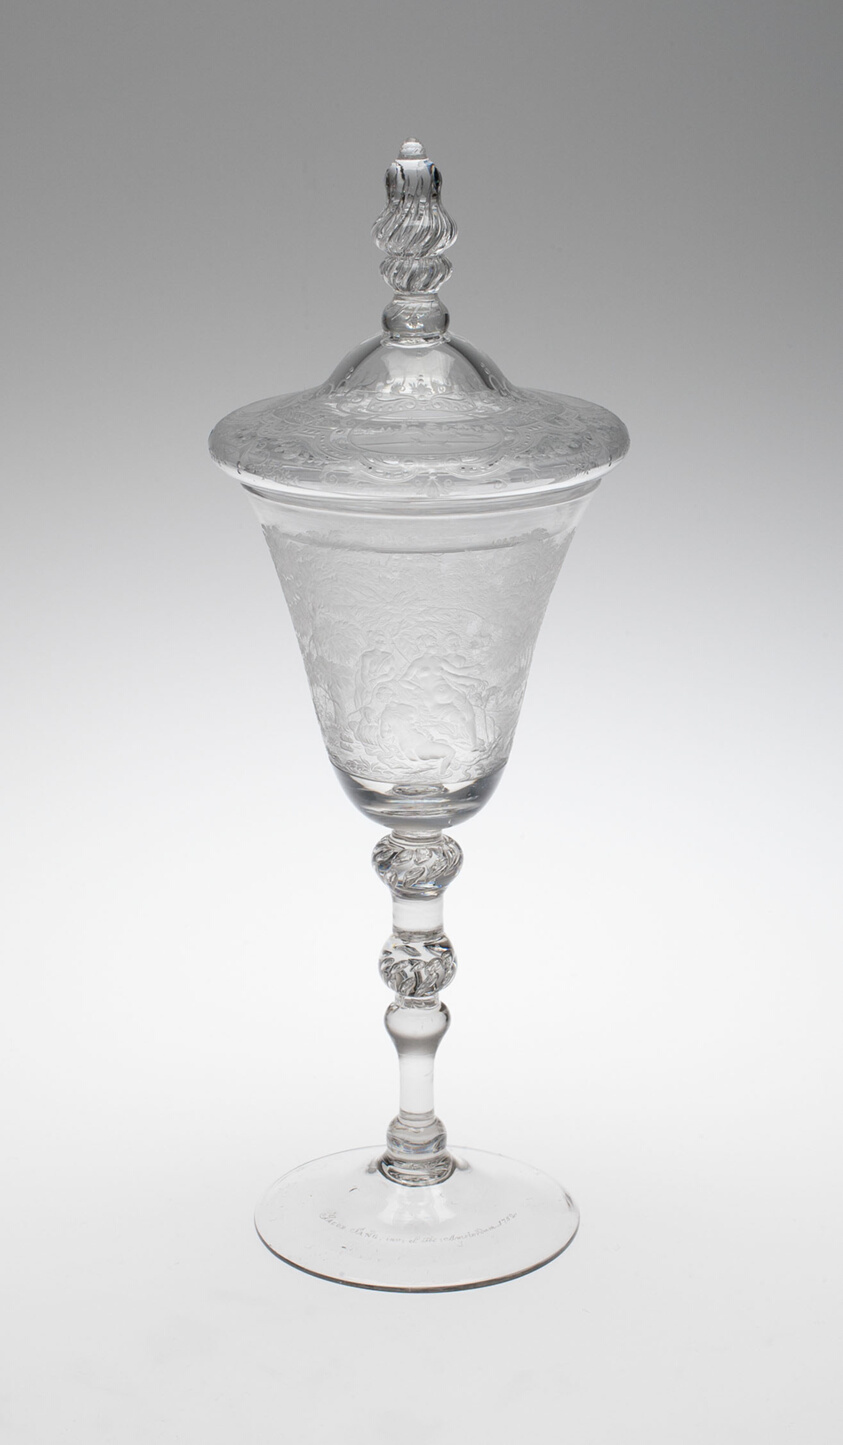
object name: Glass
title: Covered Goblet with Goddess Diana Bathing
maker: Engraved by Jacob Sang (Dutch, active 1752–62); Netherlands, Amsterdam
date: 1752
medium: Glass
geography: England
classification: drinking vessel; glass; european decorative arts